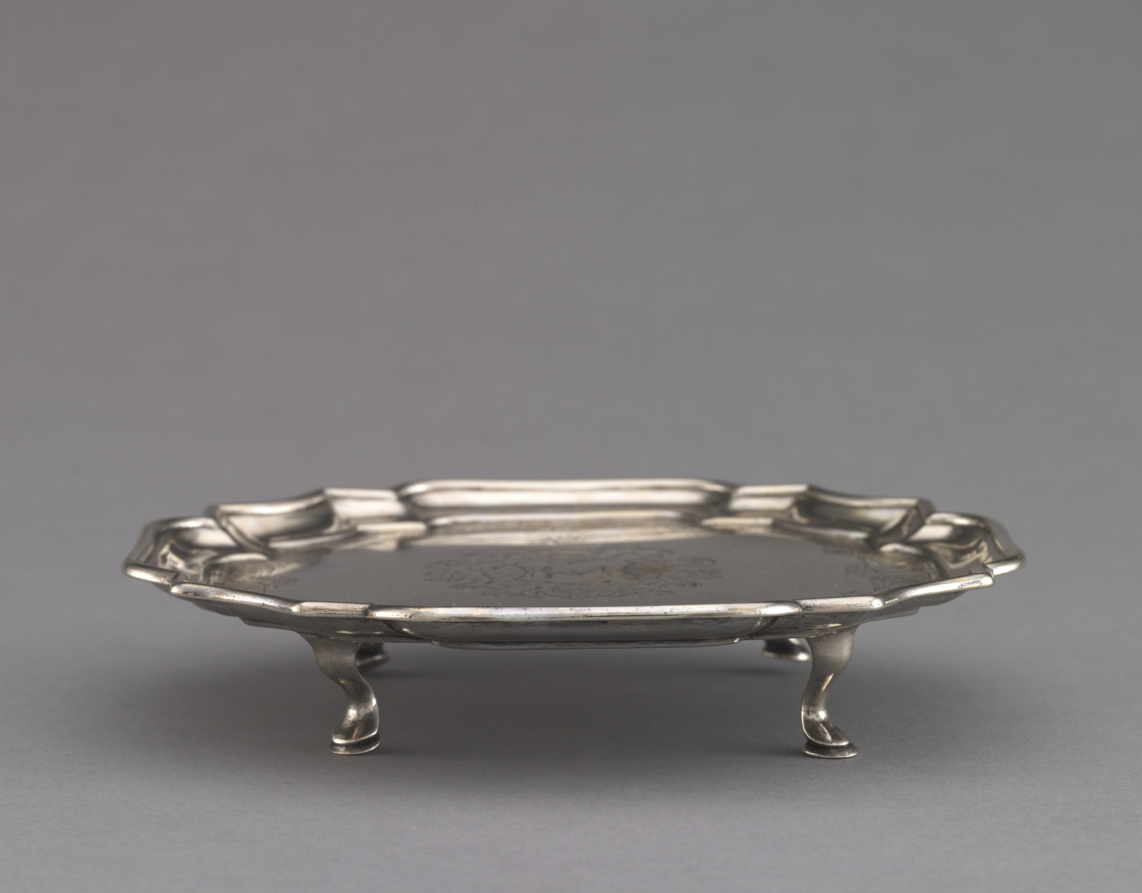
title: Salver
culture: America, Massachusetts, Boston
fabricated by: Jacob Hurd (American, 1702–1758)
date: 1740–50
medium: silver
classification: Silver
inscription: engraved: H over A + T over 1750 in shaded block letters underneath each salver.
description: The coat of arms is that of the Hastings family, the original owners of these serving pieces.